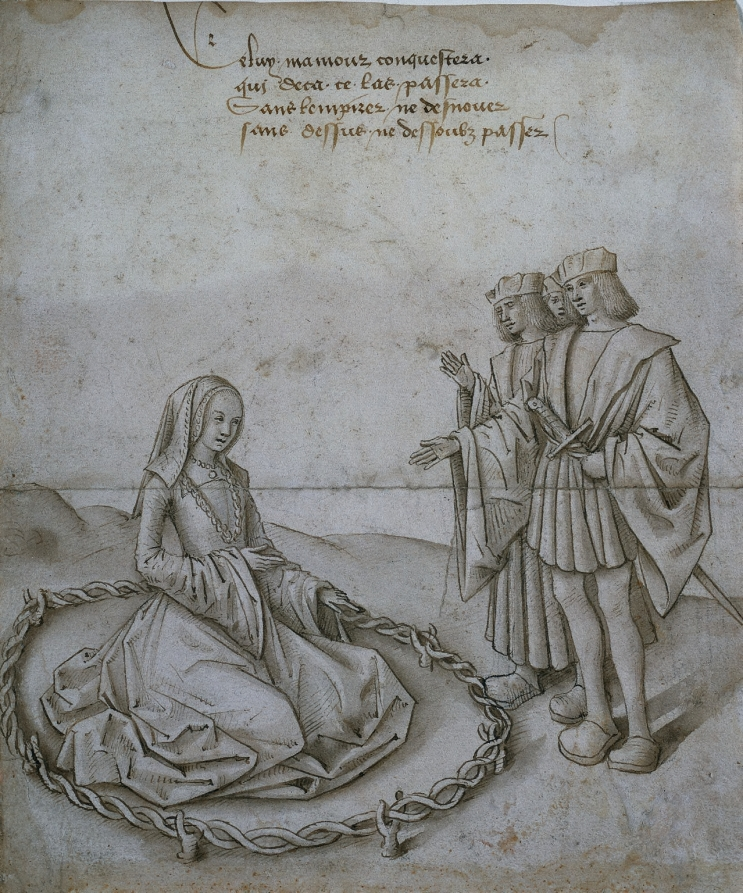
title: A Lady with Three Suitors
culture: France, 16th century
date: c. 1500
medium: pen and brown ink, brush and brown wash, with traces of black chalk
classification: Drawing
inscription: upper center, in brown ink: Celuy mamour conquestera / qui deca ce laß passera / Sanß lempirer ne desnouer / sanß dessuß ne dessoubz passez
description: This mysterious drawing shows an encounter between elegantly dressed members of the noble class. The French inscription above the image suggests that the woman is addressing her suitors and makes it clear that they are concerned with the pursuit of love: He who will conquer my love / This [barrier] must overcome / Neither destroying it nor loosening it / Going neither below it nor above. The style of the clothing reflects French court fashions during the reign of Charles VIII (1483–98), and the subject relates to the tradition of late medieval collections of love riddles that involved verbal exchanges between courtly ladies and gentlemen.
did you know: The simple background and lack of landscape detail in this drawing suggest that the image may have been a model for a tapestry or other textile.